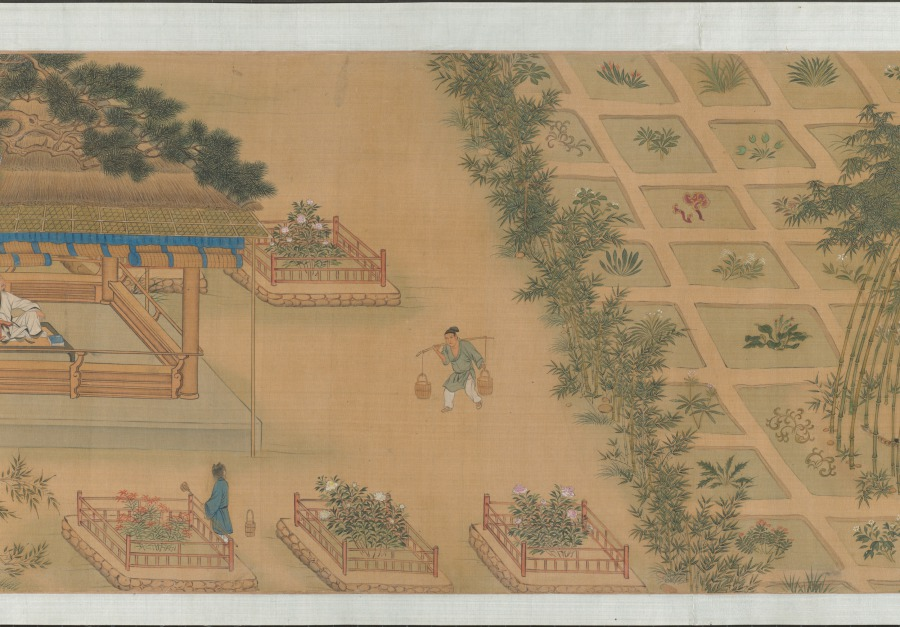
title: Garden for Solitary Enjoyment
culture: China, Ming dynasty (1368–1644)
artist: Qiu Ying (Chinese, 1494–1552)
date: 1515–52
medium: Handscroll; ink and light color on silk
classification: Painting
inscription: Accompanying text of an essay together with seven poems of Sima Guang (1019–1086) and one poem of Su Shi (1037–1101) written by Wen Zhengming (1470–1559) in 1558.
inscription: 2 colophons and 82 seals: 4 seals of Wen Zhengming 文徵明 (1470–1559); 59 seals of Xiang Yuanbian 項元汴 (1525–1590); 1 colophon, dated 1644, and 7 seals of Xiang Yukui 項禹揆 (c. late 1500s–1659); 1 colophon, dated 1880, and 2 seals of Weng Tonghe 翁同龢 (1830–1904); 2 seals of Ch'eng Chen-i (19th c.); 1 seal of Han Ch'ung (19th c.); 4 seals of Wan-go H. C. Weng 翁萬戈 (1918–2020); 3 seals unidentified.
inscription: Colophon by Xiang Yukui 項禹揆 (c. late 1500s–1659): The painting of The Garden for Self-enjoyment on the right by Shih-chou, Mr. Qiu [Qiu Ying] is in the style of Li Lung-mien. Its mood is peaceful, as if meeting the ancient gentlemen face to face among the brushes and silk; it lifts one above the sordid bustle of life. Formerly, my late father handed me this scroll which had only the painting without the written essay. I considered asking a good calligrapher to write the essay to add to it but was afraid that the quality of the writing would not match the painting. Several years later, I saw at a friend's house this essay and poems (of Ssu-ma Kuang] written by Hengshan [Wen Zhengming], once owned by my grandfather; so I spared no expense to obtain it. I rejoiced at this and said: "The divine swords are finally united. How things are pre-destined!" Now my friend Chang Kung-chao's technique for mounting [painting and calligraphy] is excellent. Therefore by daring to take them out and join them together, I can preserve this beautiful story of singular reunion. Xiang Yukui recorded at Hai-yeh-t'ang [hall] two days before New Year's Eve in the jiasheng year of the Chongzhen era [1644]. trans. LYSL/HK/WKH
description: Garden of Solitary Enjoyment refers to a site built in 1073 by the statesman Sima Guang (1019–1086) after he had retired to Luoyang, Henan province. Every spring, visitors would flock to his garden. Each of its seven structures references a historic figure. Sima wrote: I channel streams [like Du Mu], to water flowers [like Bai Juyi], or trim bamboo [like Wang Huizhi]. . . . I know of no joy between heaven and earth that could take its place. Qiu Ying’s painting, created after an 11th-century version of the same theme, must have appealed to garden owners of the Ming dynasty, since it became the template for numerous Suzhou workshop copies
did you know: Sima Guang completed his monumental survey of Chinese history, Zizhi tongjian, in the garden depicted in this painting.